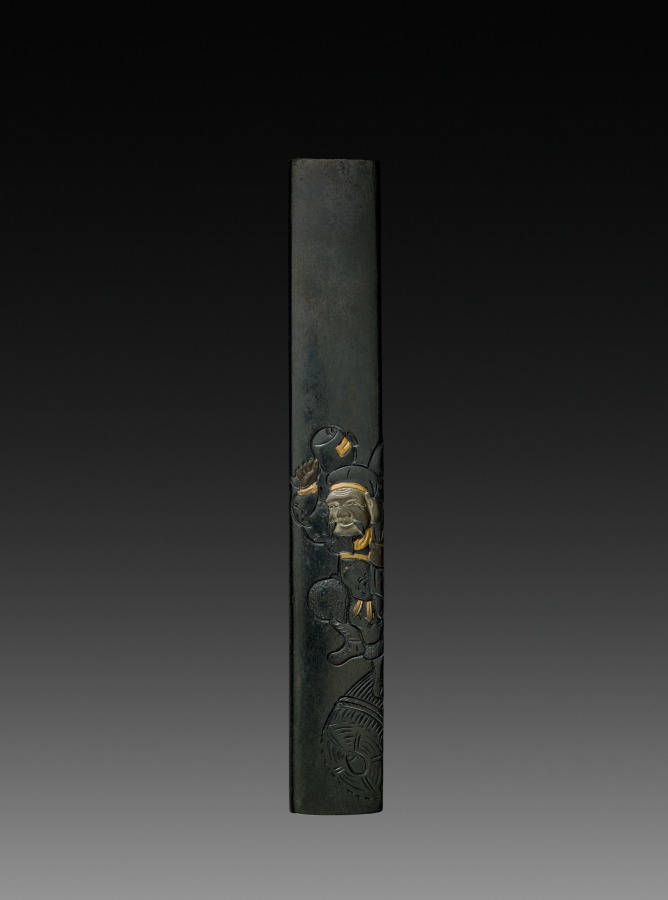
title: Knife Handle (Kozuka)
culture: Japan, Edo period (1615–1868)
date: early to mid-1800s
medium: inlaid bronze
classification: Metalwork